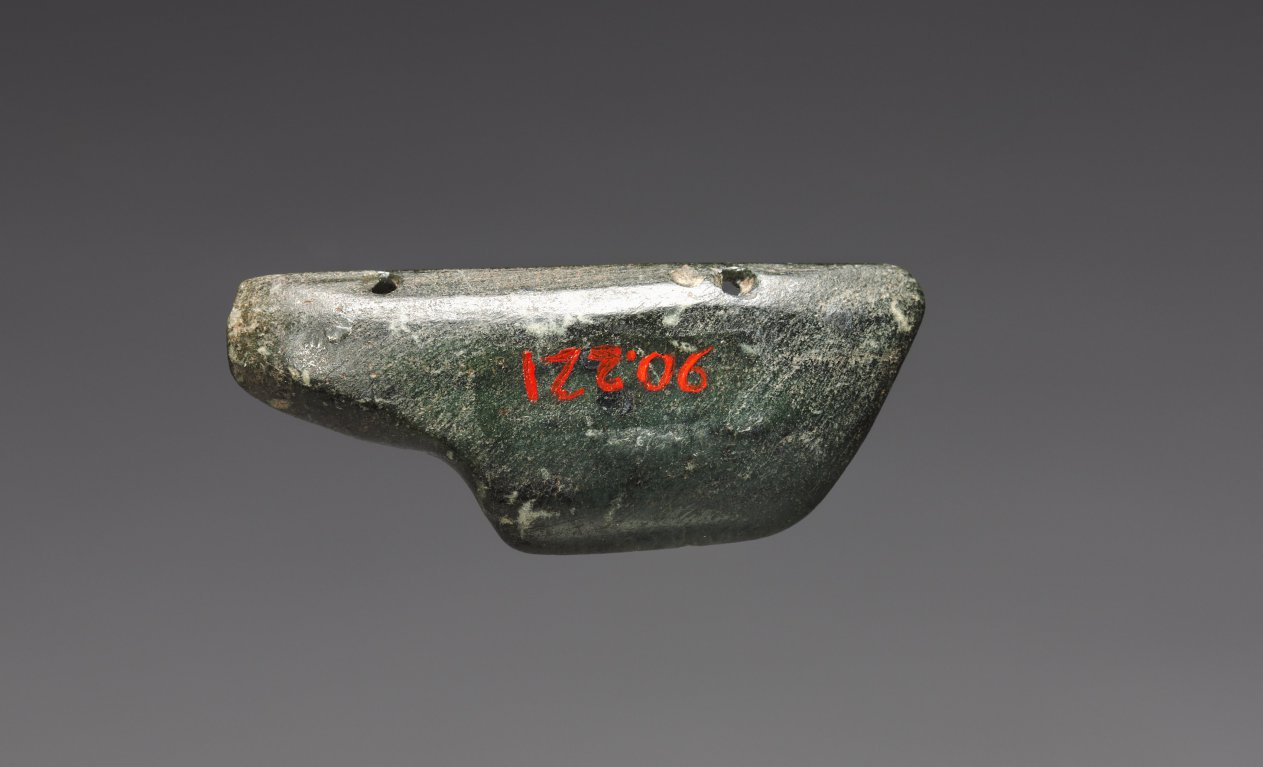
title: Mask Attachment(?)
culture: Mesoamerica, Mexico, Olmec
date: 900–300 BCE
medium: serpentine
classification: Sculpture